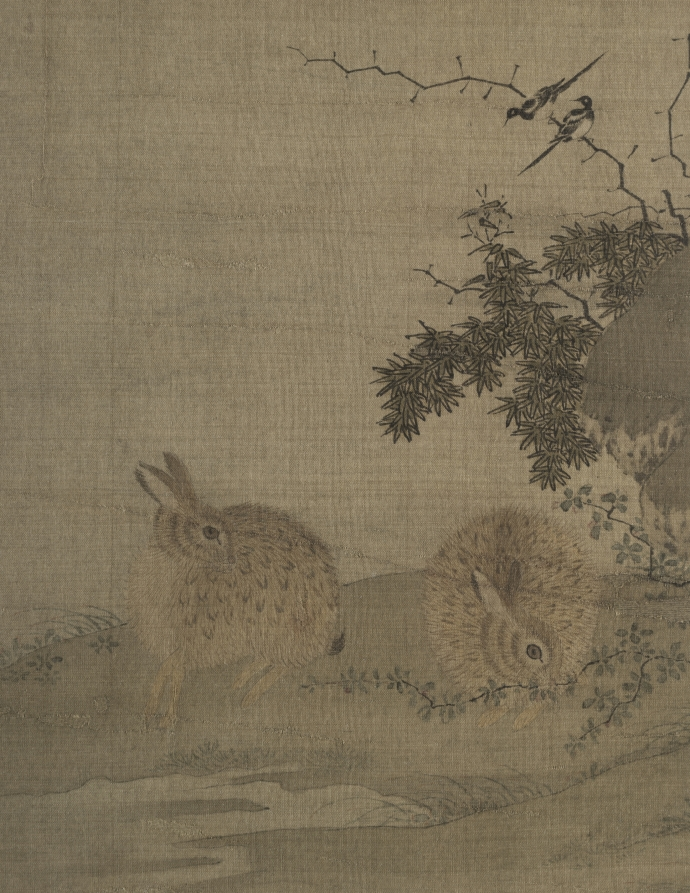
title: Magpies and Wild Rabbits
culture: China, Song dynasty (960-1279)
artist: Li Yong (Chinese, active 1200s)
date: 1200s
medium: album leaf, ink and light color on silk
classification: Painting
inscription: 1 official seal of Ming Dynasty.